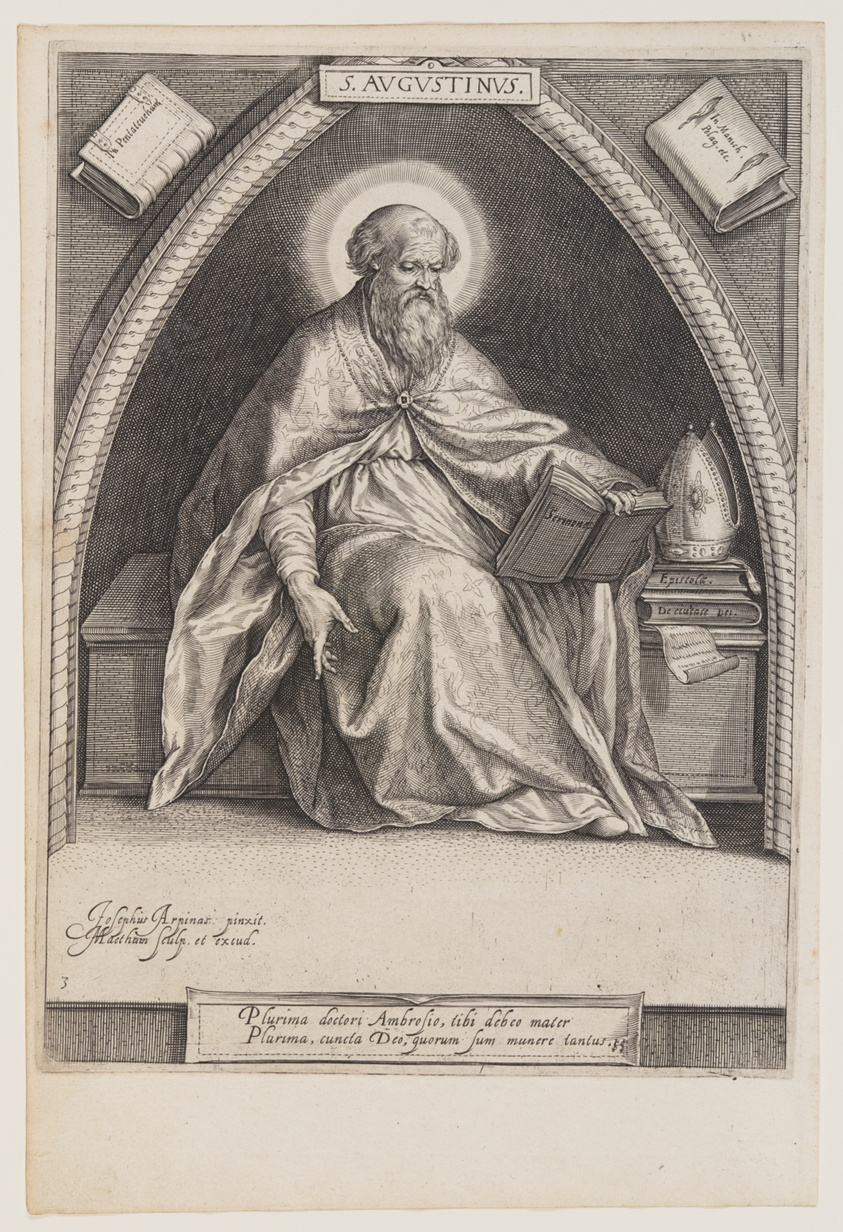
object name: Print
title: St Augustine, from The Fathers of the Church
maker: Jacob Matham (Dutch, 1571–1631); after Giuseppe Cesari (Italian, 1568–1640)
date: 1600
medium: Engraving on ivory laid paper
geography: Netherlands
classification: print; paper; prints and drawing; engraving